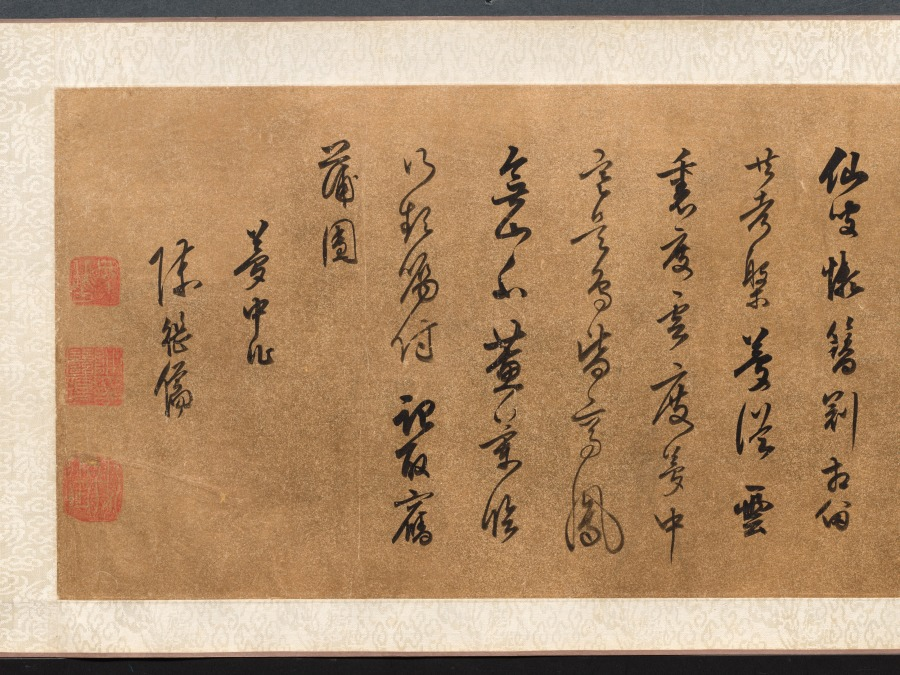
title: Four Poems: Calligraphy in Cursive Script (xingshu)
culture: China, Ming dynasty (1368–1644)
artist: Chen Jiru (Chinese, 1558–1639)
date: 1500s-1600s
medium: handscroll; ink on gold speckled paper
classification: Calligraphy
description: Written in graceful calligraphy with well-composed characters, the artist communicates his thoughts and state of mind in four poems. Characters written in dark, thick strokes convey rhythm, and indicate the moment after the writer had paused to recharge his brush with ink. Chen Jiru was a native of Huating (modern Shanghai). His calligraphy style resembles that of his friend, influential calligrapher Dong Qichang (1555–1636). Unlike Dong, Chen did not pursue government service: he burned his Confucian robes, declined a summons to serve at court, and immersed himself in literature, calligraphy, and painting.